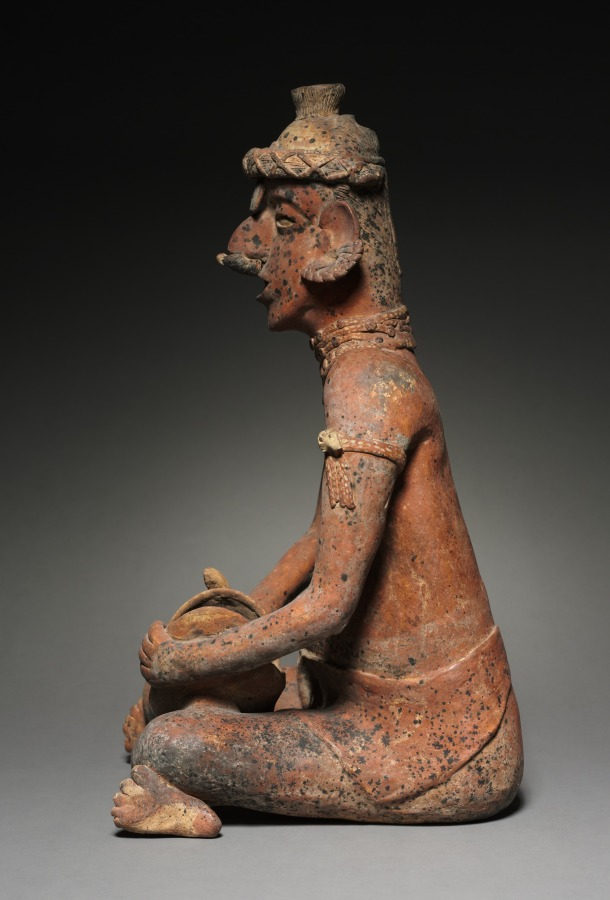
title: Male Seated Figure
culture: Mexico, Nayarit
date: 100 BCE–300 CE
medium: ceramic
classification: Ceramic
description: This couple-extremely fine examples of their kind-may commemorate the marriage of an important person, such as a chief, but could also represent siblings of a chiefly family. Whatever their relationship, their unity is conveyed by their physical similarities, including their jewelry, which marks high social station. The female is unusual in nursing an infant, likely a reference to generational renewal and the continuation of noble bloodlines. The significance of the male’s activity-beating a turtle-shell drum- is not understood.